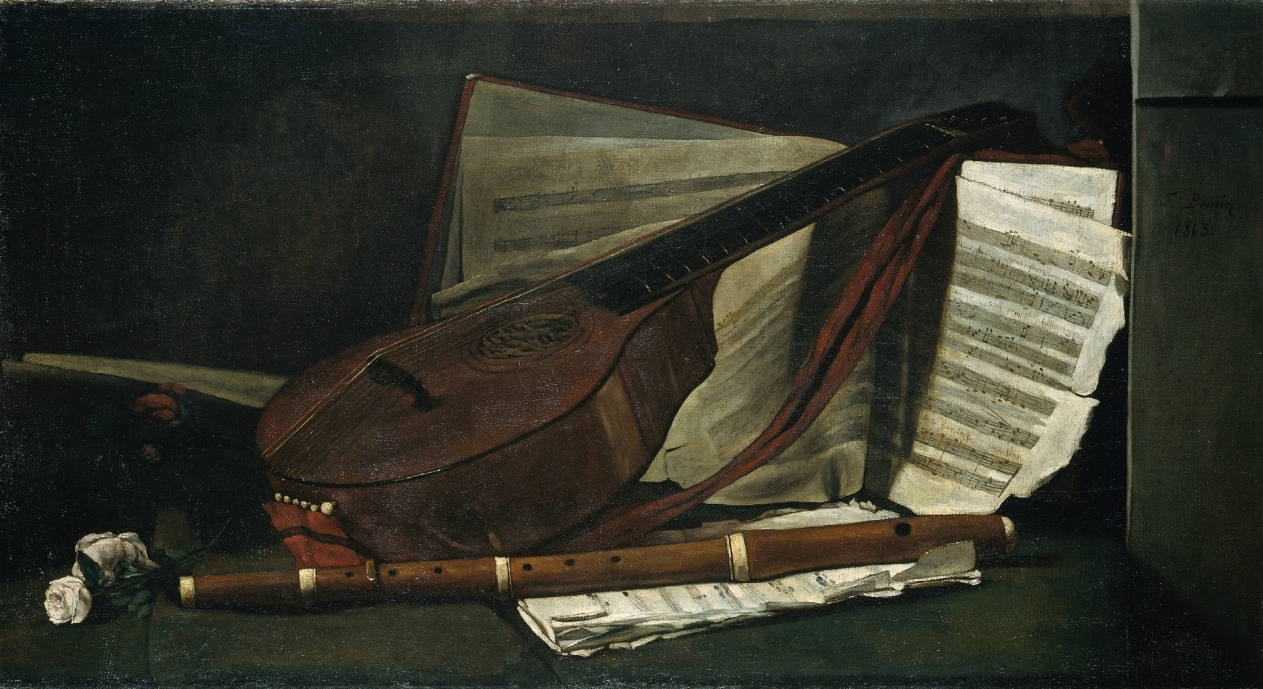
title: Attributes of Music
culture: France, 19th century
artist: François Bonvin (French, 1817–1887)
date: 1863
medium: oil on fabric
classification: Painting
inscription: Signed upper right, in umber paint: F.s Bonvin / 1863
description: A lute and flute rest on top of sheet music. This painting was intended to hang above a door, opposite still lifes that represented the other fine arts of painting and sculpture (the two related paintings are in the Musée du Louvre, Paris). Bonvin was part of the 19th-century movement known as Realism. Led by Gustave Courbet (1819-1877), the Realist painters were interested in depicting the world that surrounded them, as well as the popular culture of their time.